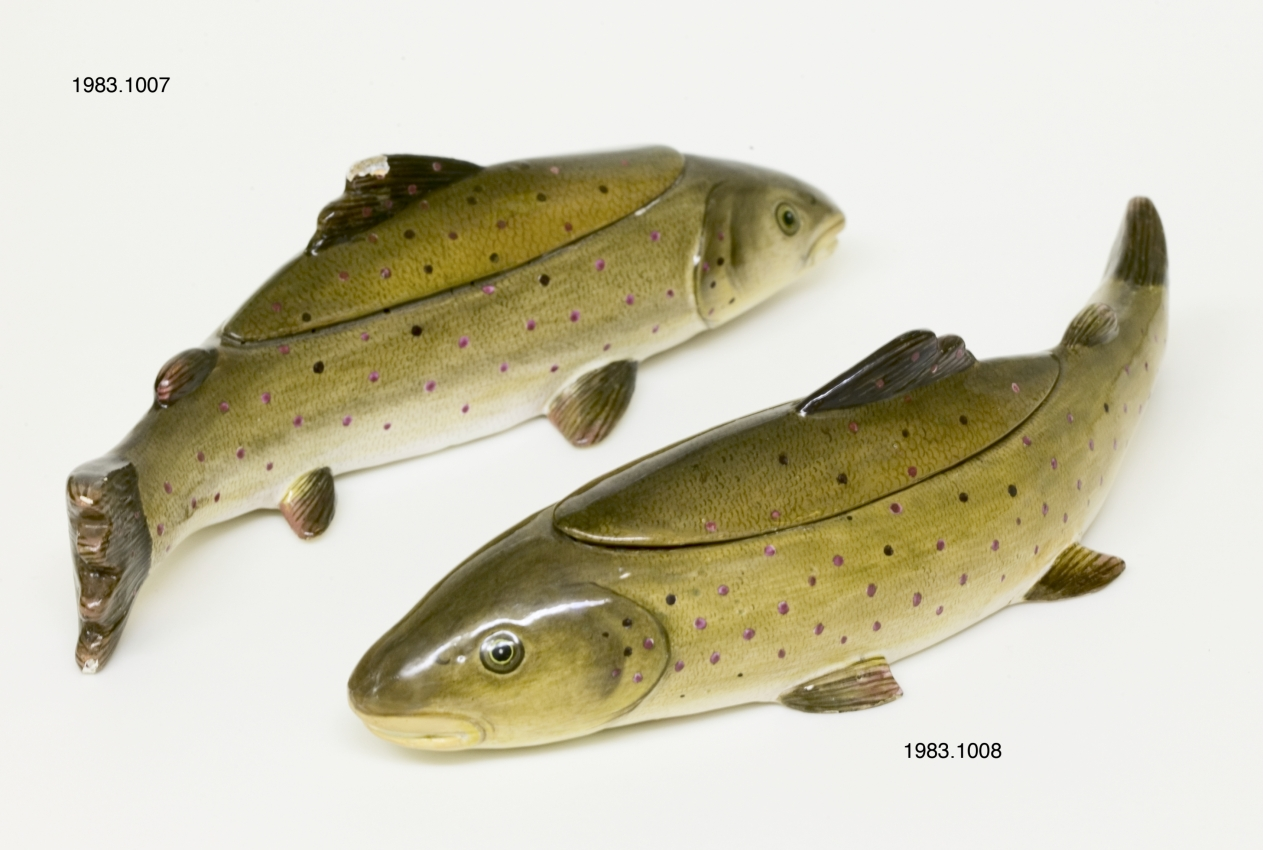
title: Box in the Form of a Fish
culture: France, Niderviller, 18th century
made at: Niderviller Factory (French)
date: 1767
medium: ceramic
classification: Ceramic